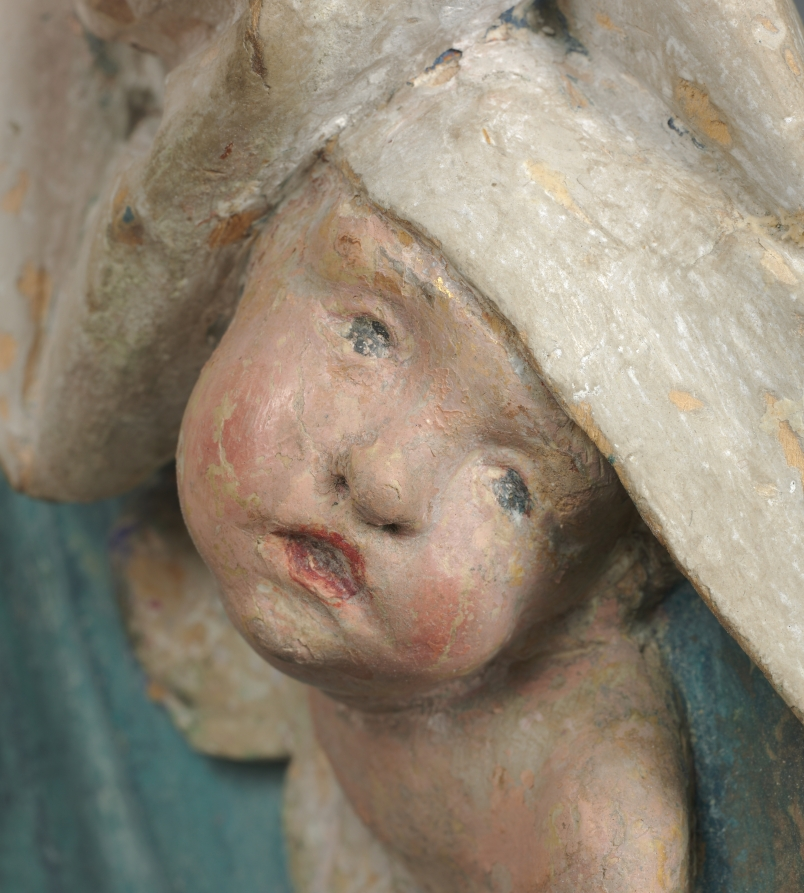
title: The Immaculate Conception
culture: Germany, Munich, 18th century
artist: Ignaz Günther (German, 1725–1775)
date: c. 1770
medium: painted and gilded wood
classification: Sculpture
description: The Christian doctrine of the Immaculate Conception maintains that the Virgin Mary was conceived free from sin, ready to be the pure vessel for Christ’s birth. Depicting such an abstract idea required specific imagery. The moon beneath the Virgin’s feet, for example, comes from the New Testament vision of Saint John the Evangelist (Revelation 12:1) of “a woman clothed with the sun, with the moon under her feet,” while the serpent upon which she treads symbolizes Christ’s triumph over original sin. With his characteristically delicate modeling, elongated proportions, and soft coloring, Ignaz Günther created an archetypal image of innocence on the cusp of womanhood.